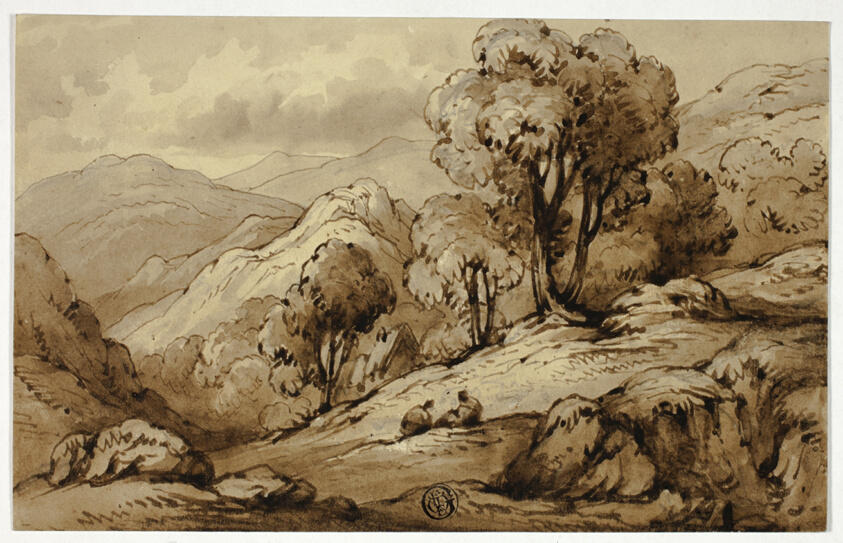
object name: Drawing and Watercolor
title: Mountainous Landscape with Two Figures in Foreground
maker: James Robertson (English, active 1815-1836); or Style of John Varley (English, 1778-1842)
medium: Pen and brown ink, and brush and brown wash, over graphite, on cream wove paper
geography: United Kingdom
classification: ink or chalk wash; drawings (visual works); prints and drawing